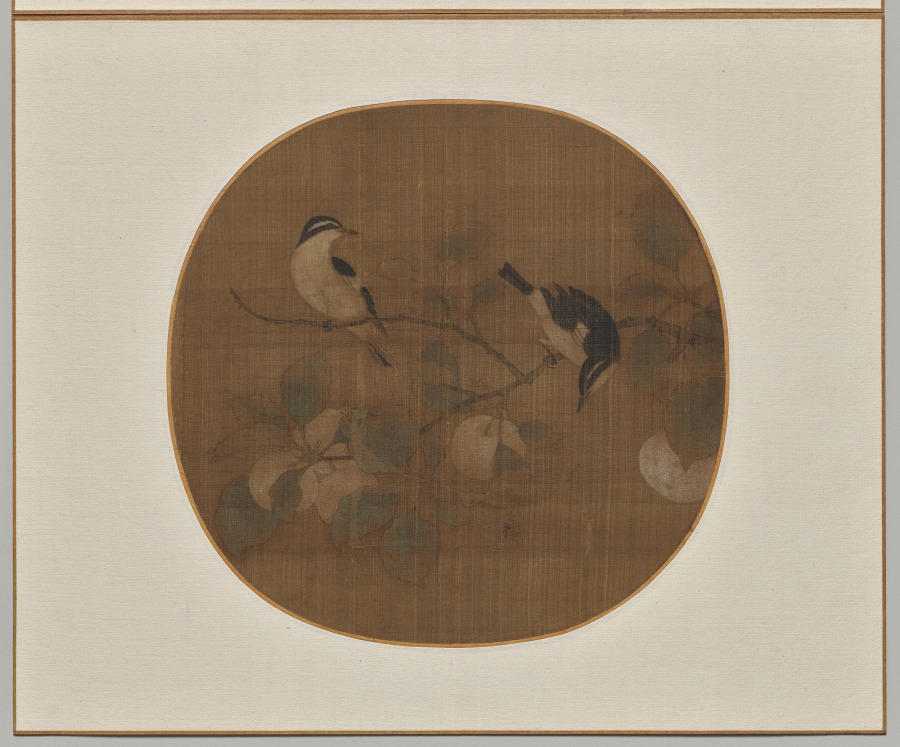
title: Birds on a Peach Branch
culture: China, Southern Song dynasty (1127–1279)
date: 1100s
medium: Album leaf; ink and light color on silk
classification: Painting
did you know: An insect is drawn to the scent of the ripe peaches. Is the bird going to catch it?